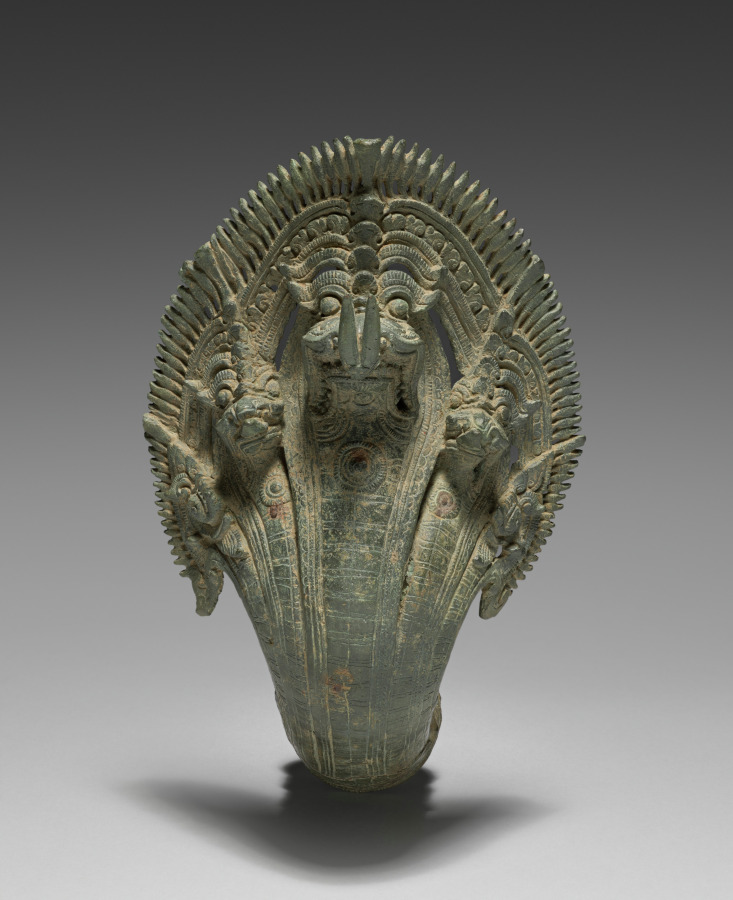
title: Naga Finial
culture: Cambodia, Angkor Wat period, 1100s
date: 1100s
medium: bronze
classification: Metalwork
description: When members of the royal family or priesthood traveled in a public festival procession or to a temple to make offerings or participate in a ceremony, they would be carried in a palanquin, or a covered litter. Portable objects of veneration, such as bronze images or a sacred fire, were also carried on palanquins. The palanquins had wooden poles, hanging seats or raised platforms, and bronze fittings cast in intricate forms and gilt, lending the palanquins a sumptuous quality. The royal palanquins were typically fitted with multiheaded, serpent-shaped finials at the ends of the poles and corners of the elevated platforms. Naga means serpent in Sanskrit, a language from India selectively appropriated by the Khmer in Cambodia. In their own indigenous mythology, the Khmer people trace their descent from a naga princess and a prince from the island of Java who journeyed to Cambodia. The naga remains a potent emblem for the Khmer nation to this day; it is ubiquitous on Cambodian monuments.